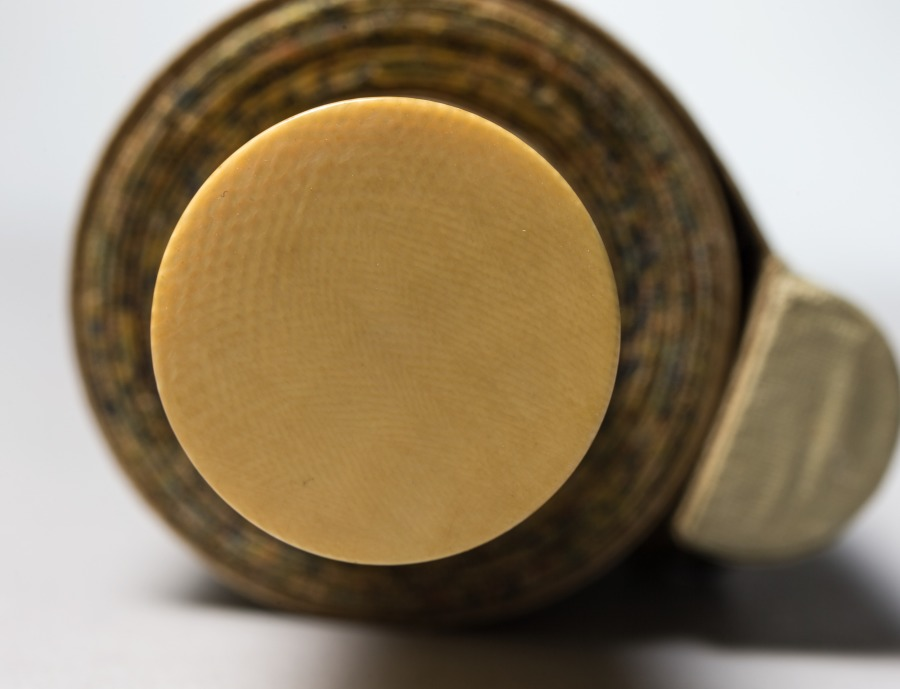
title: Buddha Amitābha with Two Attending Bodhisattvas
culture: China, Southern Song dynasty (1127-1279)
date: 1200s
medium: Hanging scroll; ink and color on silk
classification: Painting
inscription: 南無阿彌陀佛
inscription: 沙門善導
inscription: 觀世音菩薩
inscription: 大勢至菩薩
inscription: 永隆元年十月十五日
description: The supreme deities that rule over the Western Paradise—Amitābha (阿彌陀 in Chinese), Avalokiteśvara (Guanyin 觀音), and Mahāsthāmaprāpta (Dashizhi 大勢至)—are here enclosed within a circle of light. To secure entry into that paradise for Buddhist followers of the Pure Land sect, one must recite the phrase namo amituofo (南無阿彌陀佛, Homage to the Buddha Amitābha). Here the phrase is repeated 10 times in calligraphy above the figures, reinforcing the need for continual recitation.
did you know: Each line of calligraphy, which invokes the Buddha's name, emerges from a lotus blossom.